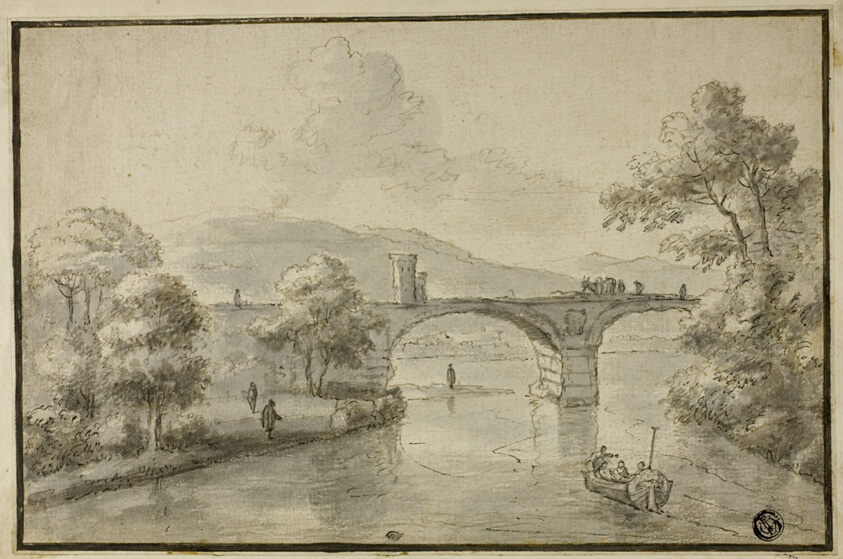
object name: Drawing and Watercolor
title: River with Arched Bridge and Boat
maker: Attributed to Herman van Swanevelt; Dutch, c. 1600-1655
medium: Pen and black and brown ink, with brush and gray wash, on ivory laid paper, laid down on ivory laid paper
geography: Holland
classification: ink or chalk wash; drawings (visual works); prints and drawing